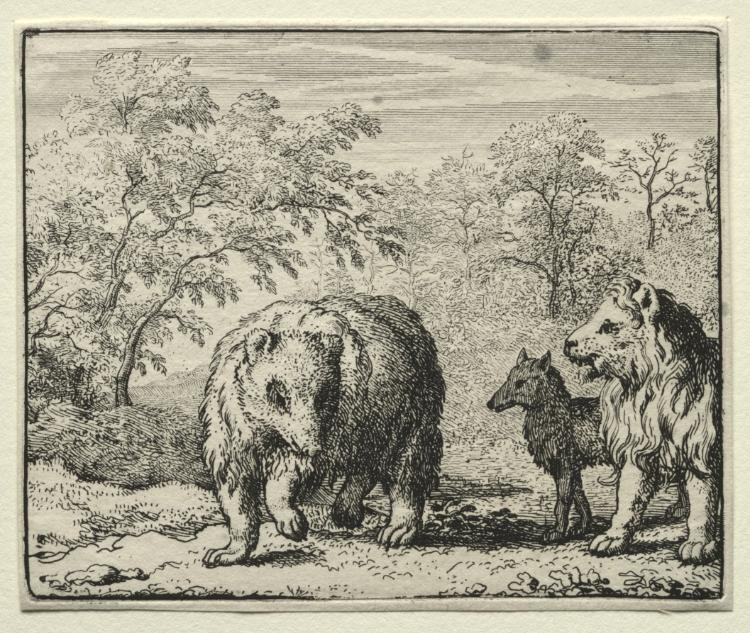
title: Reynard the Fox: The Freeing of the Wolf and the Bear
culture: Netherlands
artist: Allart van Everdingen (Dutch, 1621–1675)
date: 1650–75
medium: etching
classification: Print